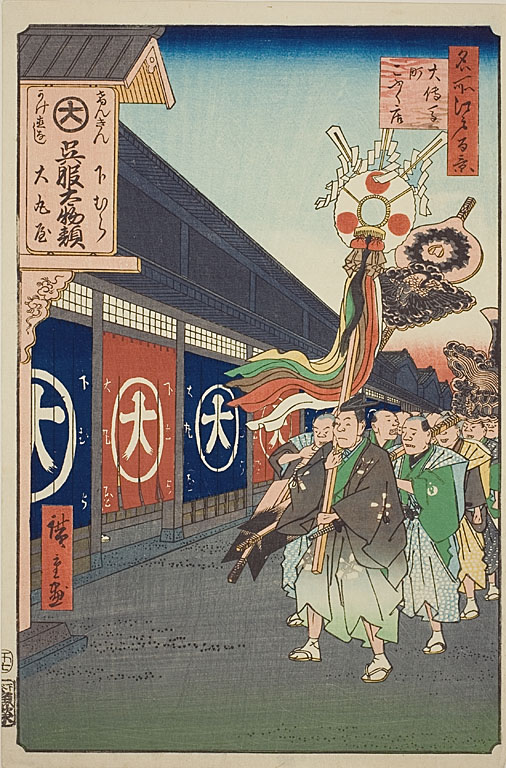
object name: Print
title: Silk-goods Lane, Odenma-cho (Odenma-cho gofukudana), No.74 from the series "One Hundred Famous Views of Edo (Meisho Edo hyakkei)"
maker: Utagawa Hiroshige (Japanese, 1797-1858)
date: 1858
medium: Color woodblock print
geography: Japan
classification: woodblock print; print; asian art